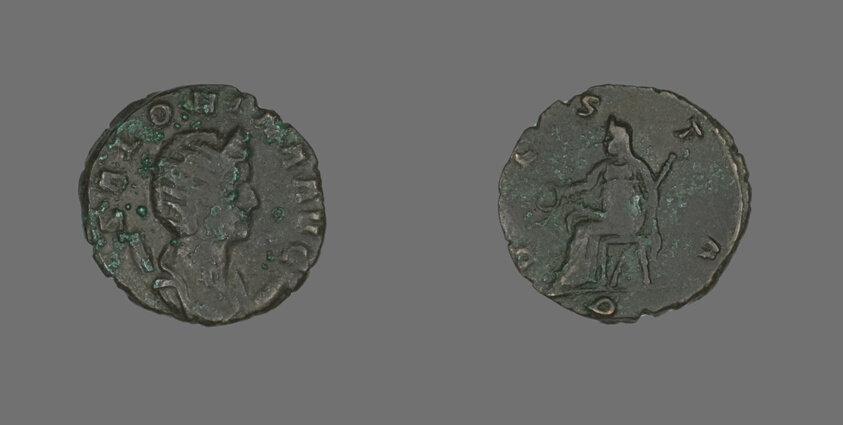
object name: Coin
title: Antoninianus (Coin) Portraying Empress Salonina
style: roman (ancient, style or period)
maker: Roman, minted in Rome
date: 260-268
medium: Billon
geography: Roman Empire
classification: coin; ancient art